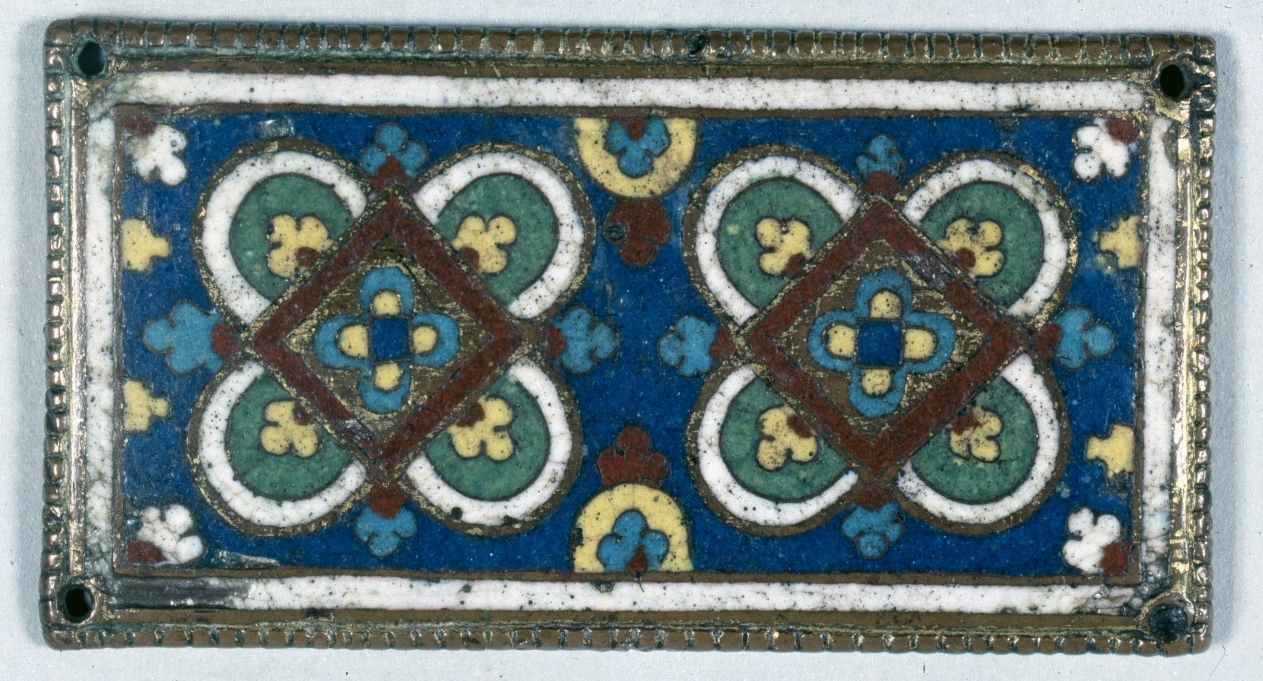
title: Plaque, probably from a Reliquary Shrine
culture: Germany, Aachen?, Gothic period, 13th century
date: 1225–1250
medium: gilded copper; champlevé enamel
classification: Enamel